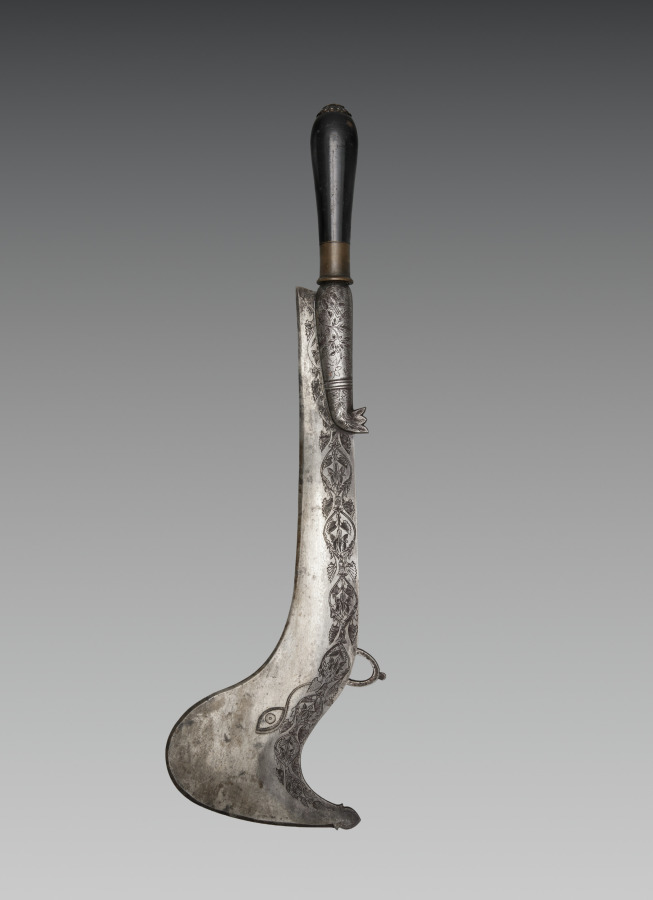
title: Knife or Axe (Kharga)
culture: Nepal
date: 1800s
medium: iron with wooden handle and leather scabbard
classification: Arms and Armor